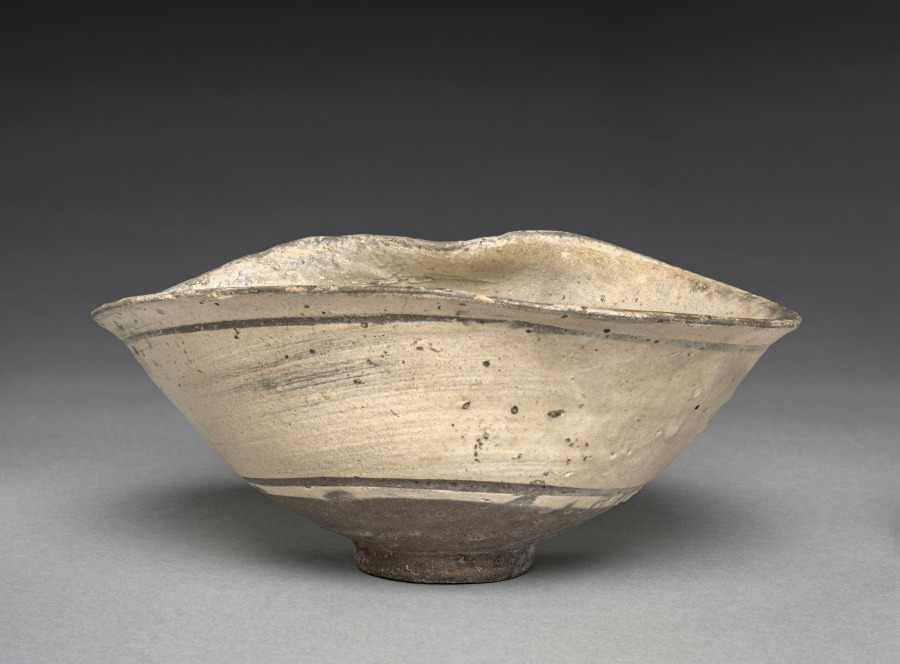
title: Bowl with Brushing Decorations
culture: Korea, Joseon dynasty (1392–1910)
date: 1400s–1500s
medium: Clay, glaze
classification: Ceramic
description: This type of wide-mouthed bowl was used everyday in Korea, not exclusively for tea drinking. But when it was introduced to Japan around the early 1500s, its imperfect appearance evoking the aesthetics of wabi-sabi caused it to be repurposed as a tea bowl. Korean tea bowls were circulated as an item of foreign luxury among Japanese military elites. Many Korean potters were abducted to Japan during the Japanese invasions (1592–98) and some settled down in provinces such as in the Saga prefecture in Kyushu. Dislocated Korean potters are often credited for their leading role in the development of ceramic industry in Japan.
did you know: This type of humble tea bowl was highly praised among Japanese collectors for its imperfect beauty.